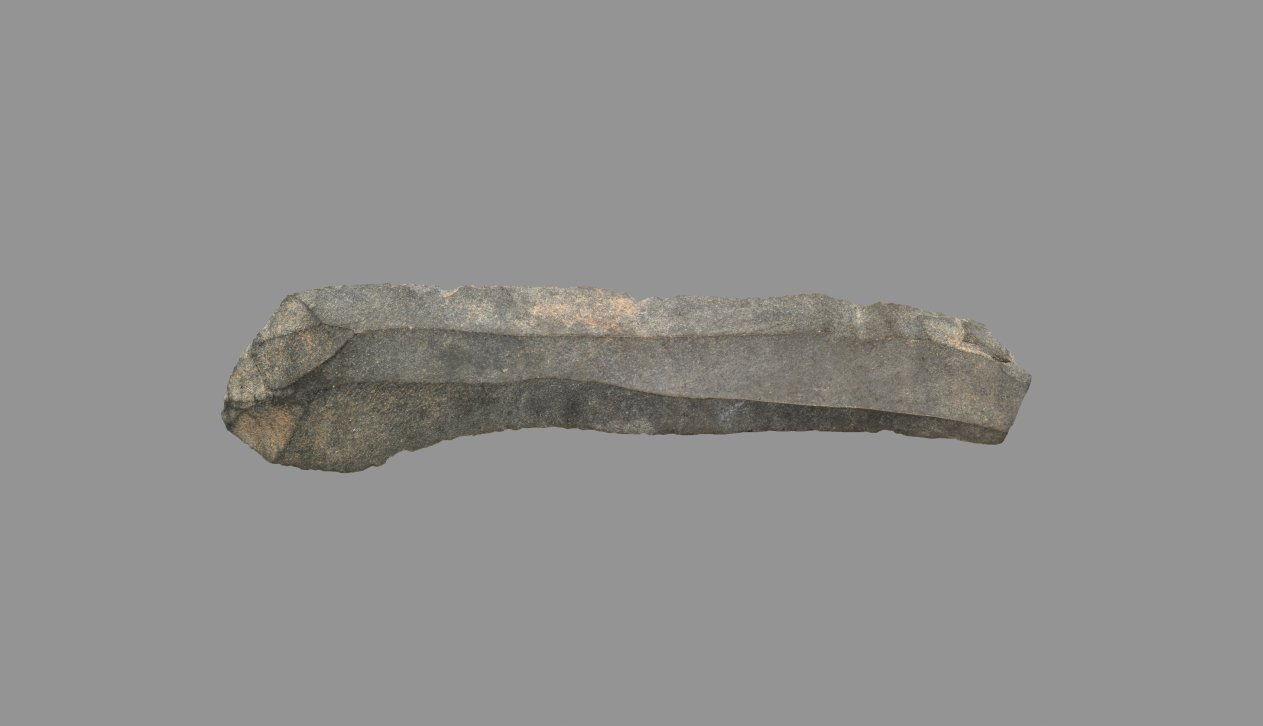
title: Sickle Blade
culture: Egypt, Middle Kingdom (2040–1648 BCE), Dynasty 12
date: 1980–1801 BCE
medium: flint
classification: Implements